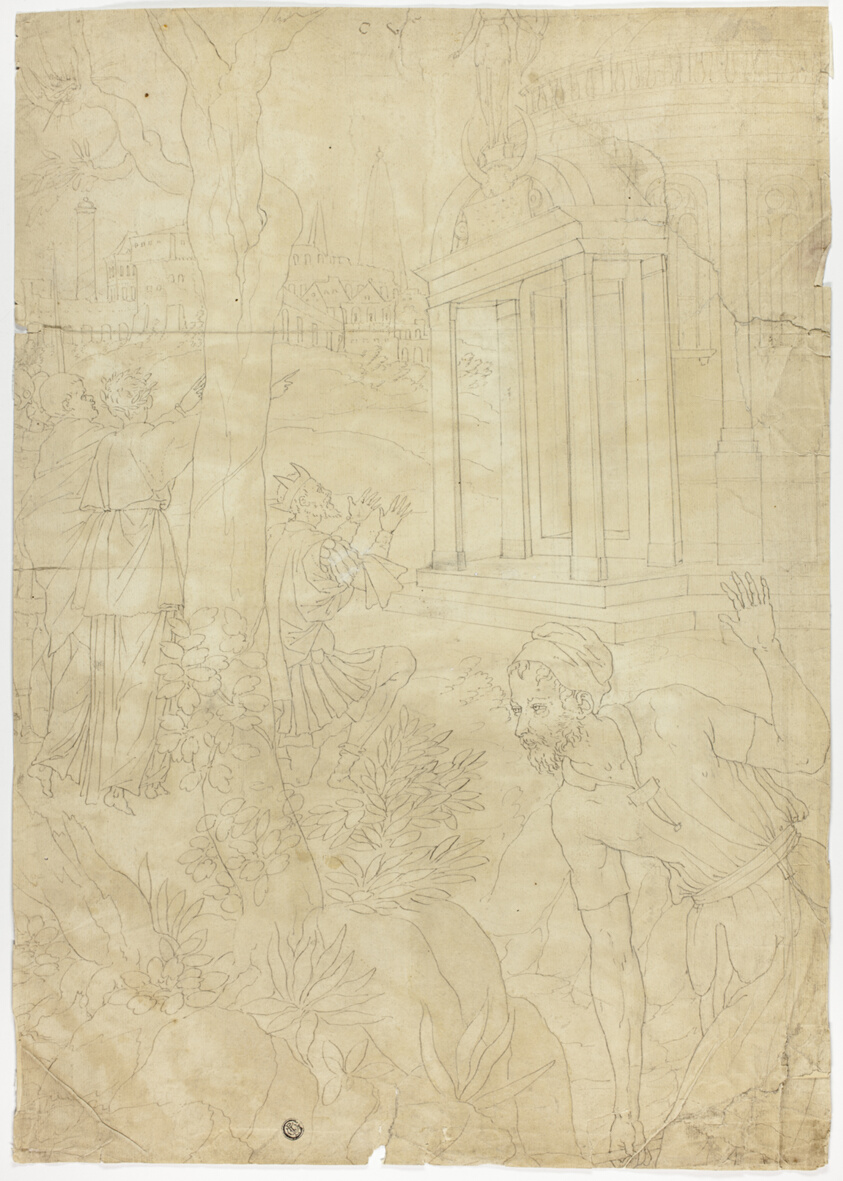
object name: Drawing and Watercolor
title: Agamemnon Kneeling in Front of the Temple of Diana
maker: School of Fontainebleau, possibly Charles Carmoy; French, active 1537-1550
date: c. 1548-1550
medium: Pen and brown ink, with brush and brown wash, over traces of graphite, on tan laid paper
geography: France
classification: pen and ink drawings; drawings (visual works); prints and drawing